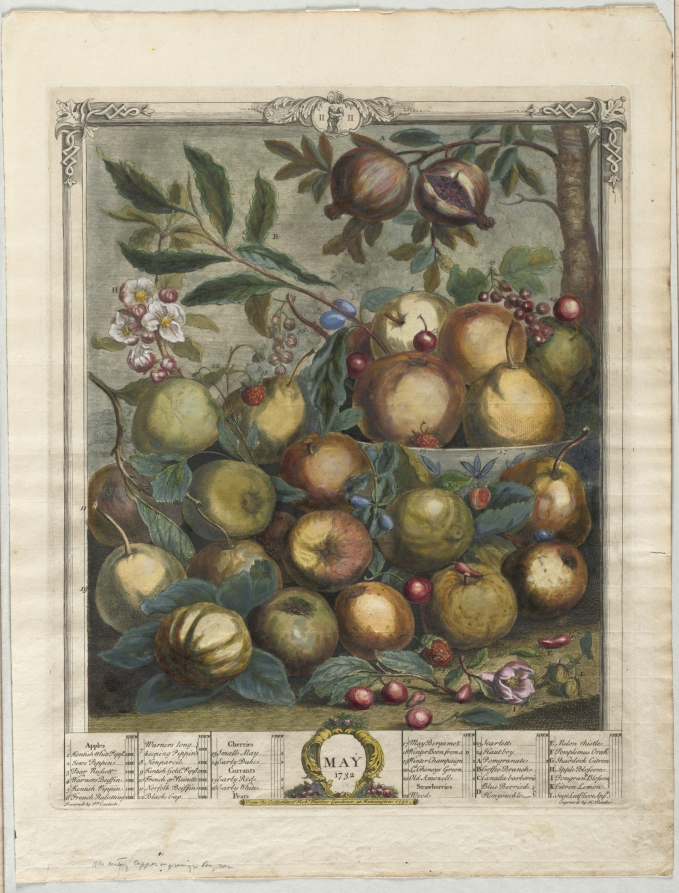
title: Twelve Months of Fruit: May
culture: England, 18th century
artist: Henry Fletcher (British, active 1715–38)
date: 1732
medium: engraving, hand-colored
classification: Print